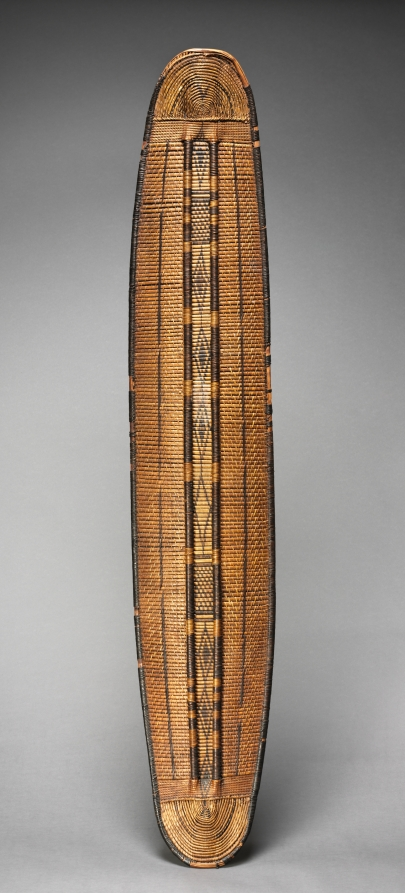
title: Shield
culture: Central Africa, Democratic Republic of the Congo, early 20th century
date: c. 1900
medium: Bamboo, wood, and plant fibers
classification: Arms and Armor